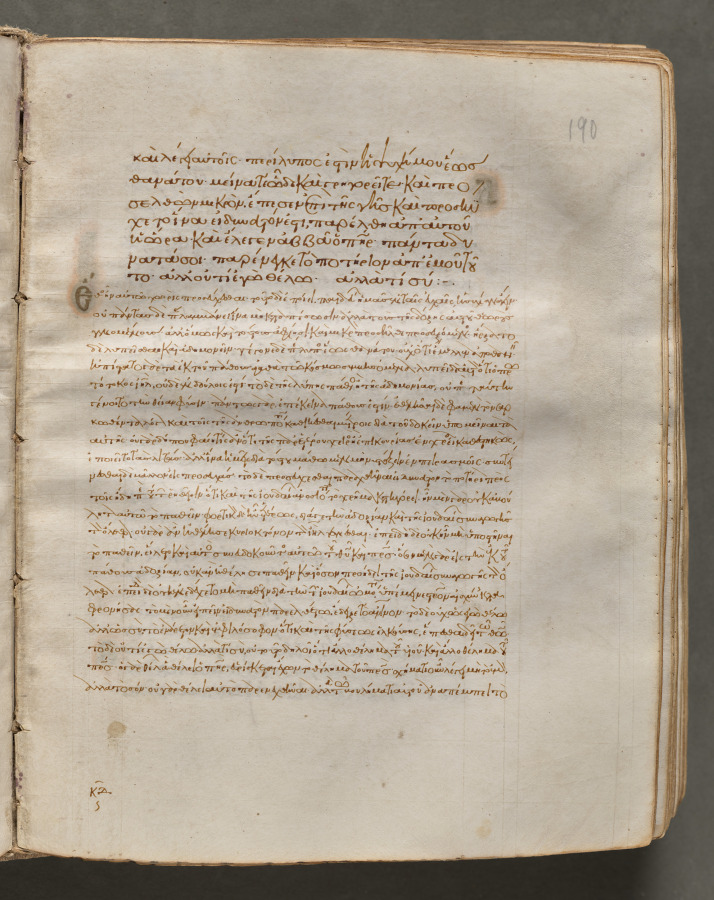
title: Text, folio 190 (recto), from a Gospel Book with Commentaries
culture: Byzantium, Constantinople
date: c. 1000–1100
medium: ink, tempera, and gold on vellum; leather binding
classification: Bound Volume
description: Each of the four gospels in this book opens on a page with brilliantly illuminated borders depicting the author of the text as well as birds-principally peacocks, symbols of the immortality of the soul-and fountains, representing the fountain of life and the salvation of the soul. This volume consists of 428 leaves with texts in Greek. Its level of sophistication suggests that it was probably written and decorated in a monastery in Constantinople.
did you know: Gospel Books were carried in procession through Byzantine churches.